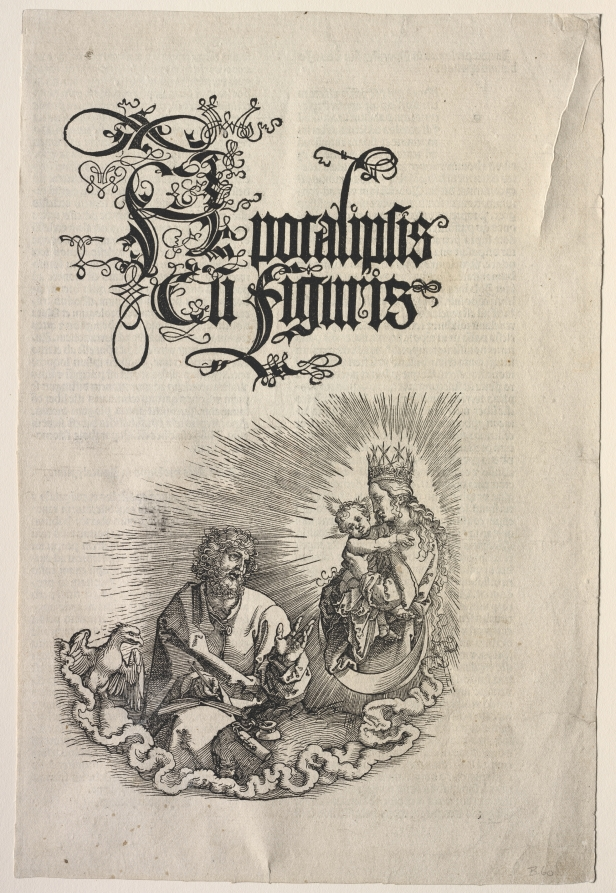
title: Revelation of St. John: Title Page to the Apocalypse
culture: Germany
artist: Albrecht Dürer (German, 1471–1528)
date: 1511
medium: woodcut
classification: Print